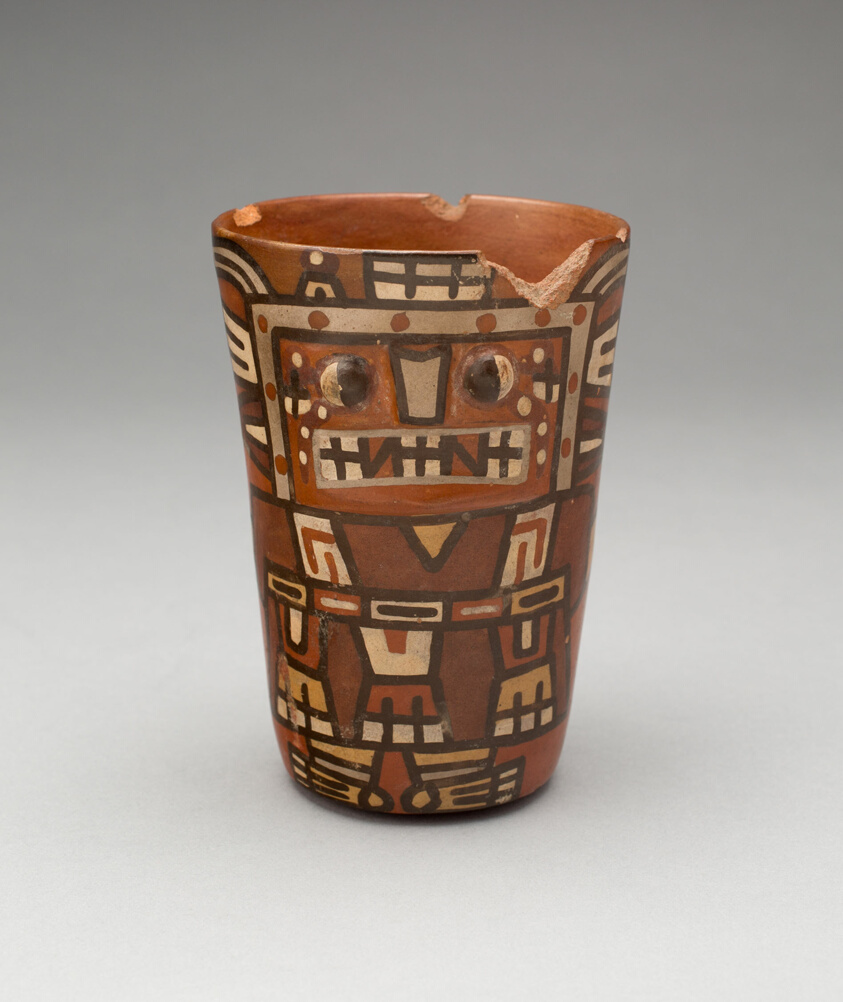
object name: Vessel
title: Drinking Cup (Kero) with an Abstracted Masked Figure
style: tiahuanaco, middle horizon, Pre-Columbian, americas, huari, andes, Arts of the Americas, andean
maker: Tiwanaku-Wari; Bolivia or Peru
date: 600–1000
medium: Ceramic and pigment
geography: Southern Peru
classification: earthenware; ceramics; vessel; art of the americas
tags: abstract figures